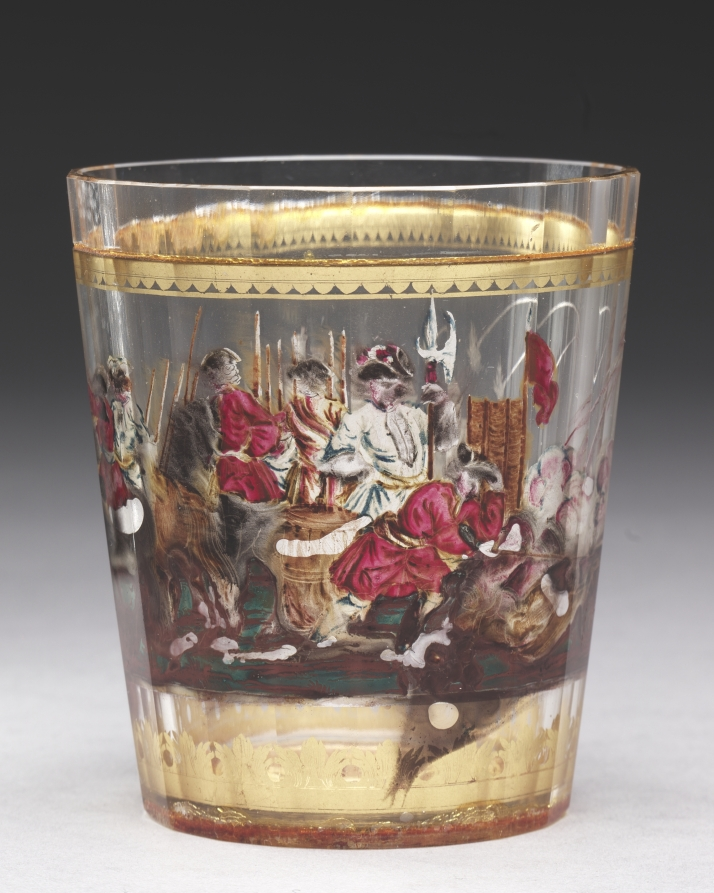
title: Tumbler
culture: Bohemia, 18th century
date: c. 1730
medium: zwischengoldglas (glass)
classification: Glass